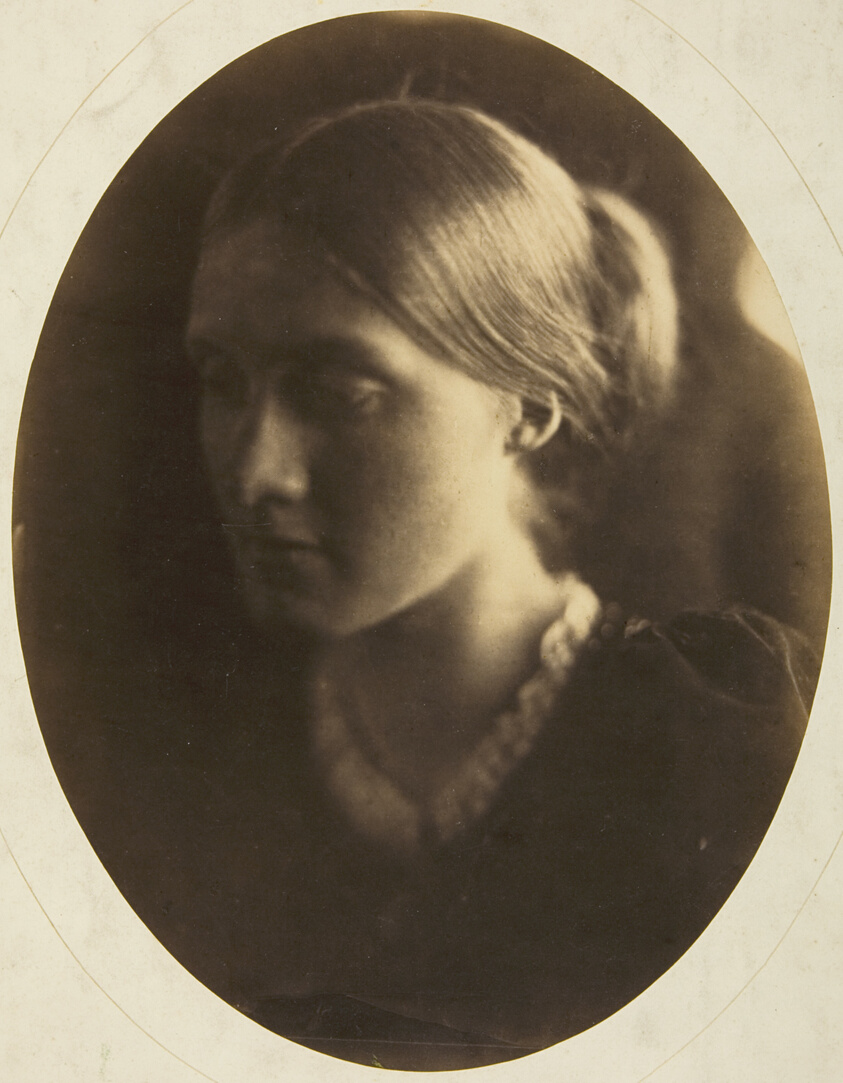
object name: Photograph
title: Julia Jackson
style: 19th century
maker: Julia Margaret Cameron (English, 1815–1879)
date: c. 1867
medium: Albumen print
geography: England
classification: albumen silver print; photographic process; photography; photograph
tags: Collected by Hugh Edwards